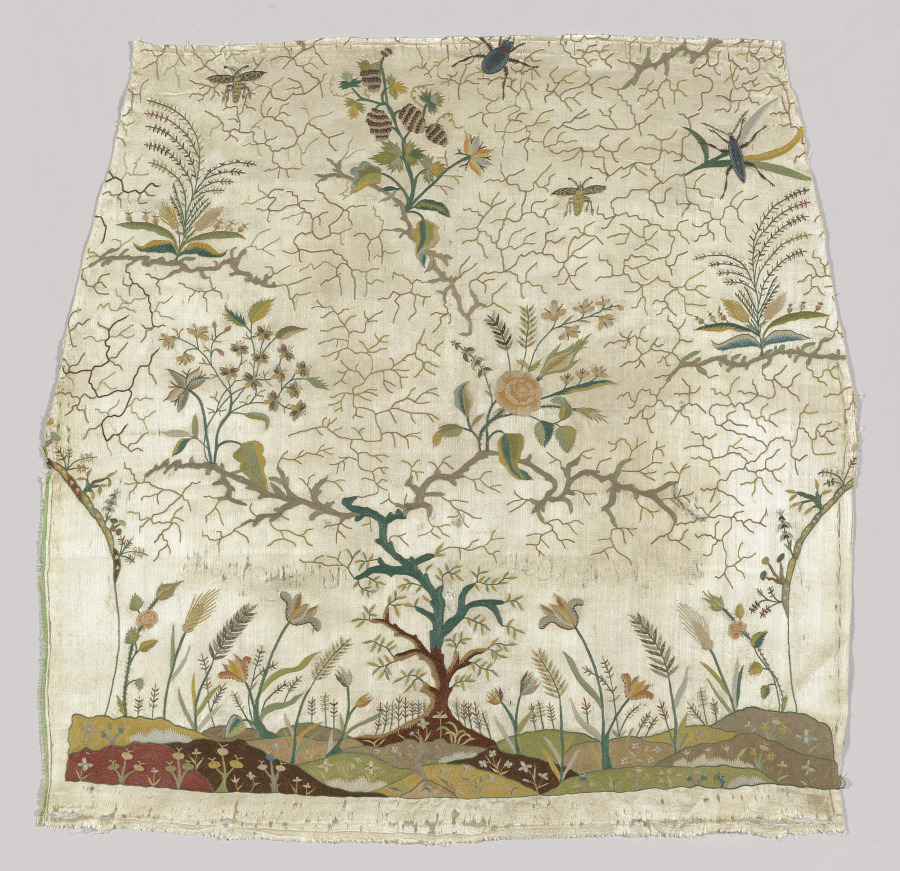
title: Fragment of a Garment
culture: India, Gujarat, 19th century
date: 1700s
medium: embroidery, silk thread on silk ground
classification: Embroidery